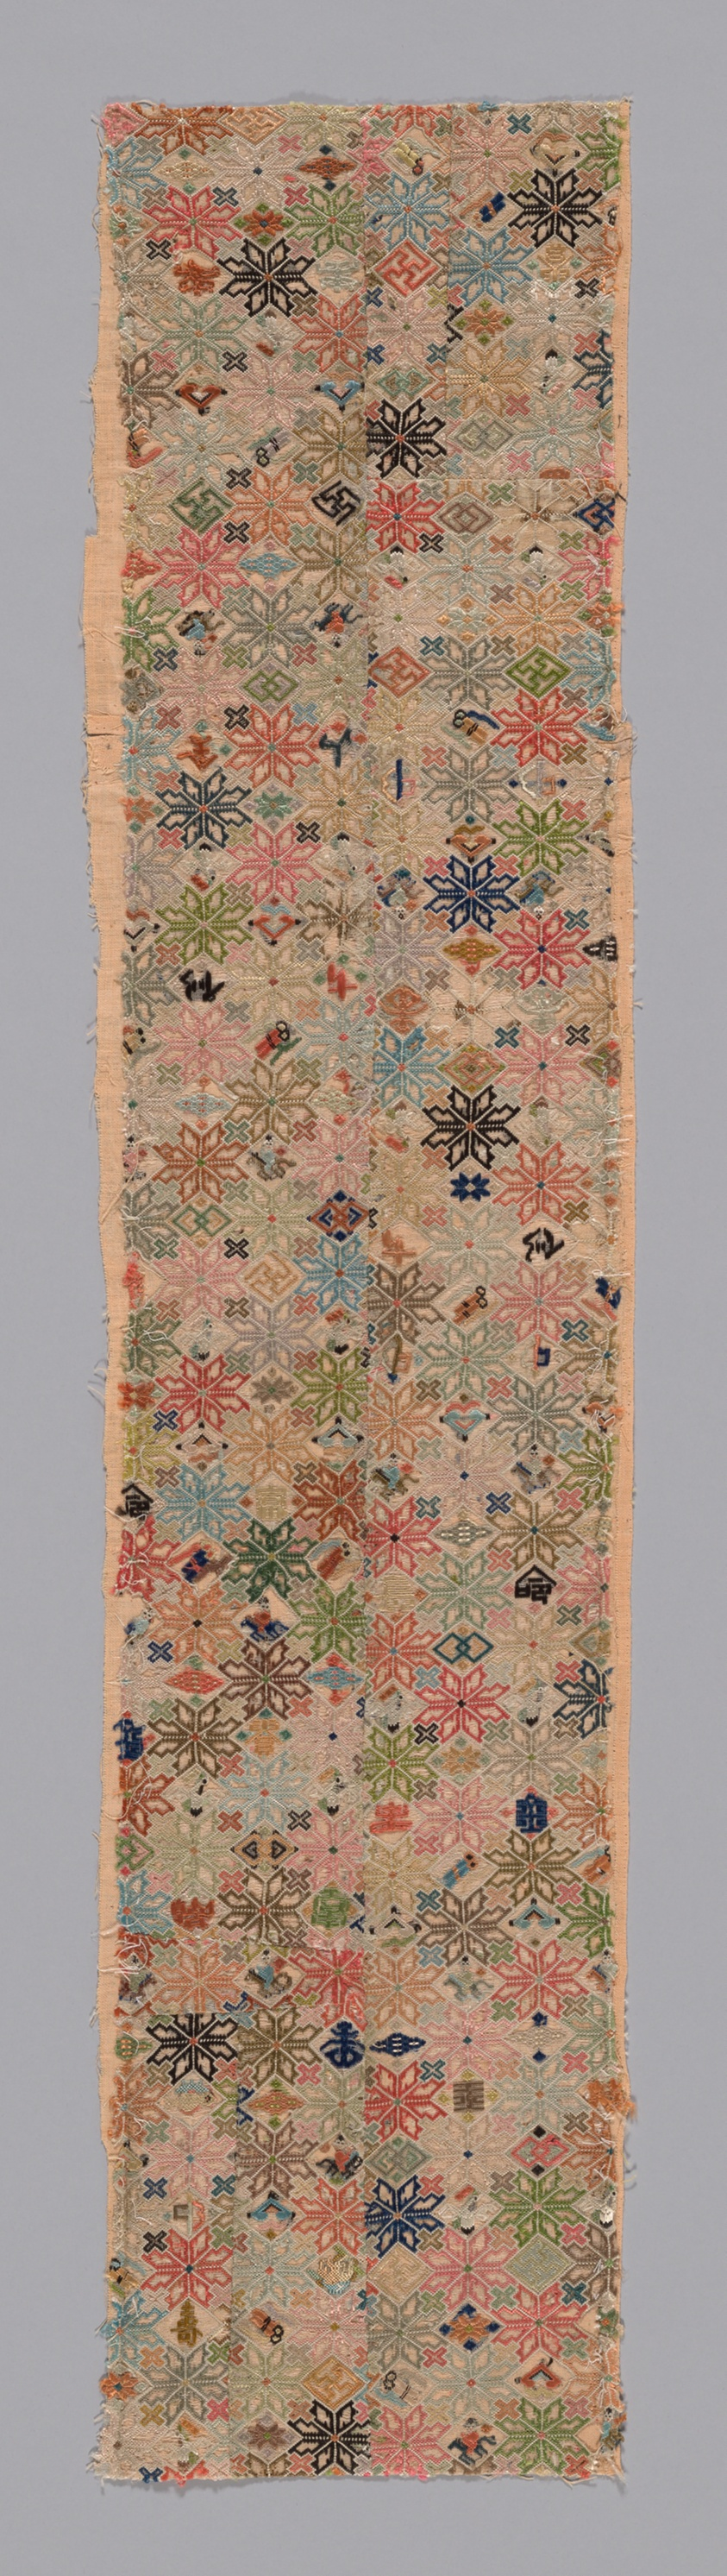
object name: Textile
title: Panel (sleeveband)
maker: China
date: 1875/1900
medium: embroidered gauze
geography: China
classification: textile; weaving